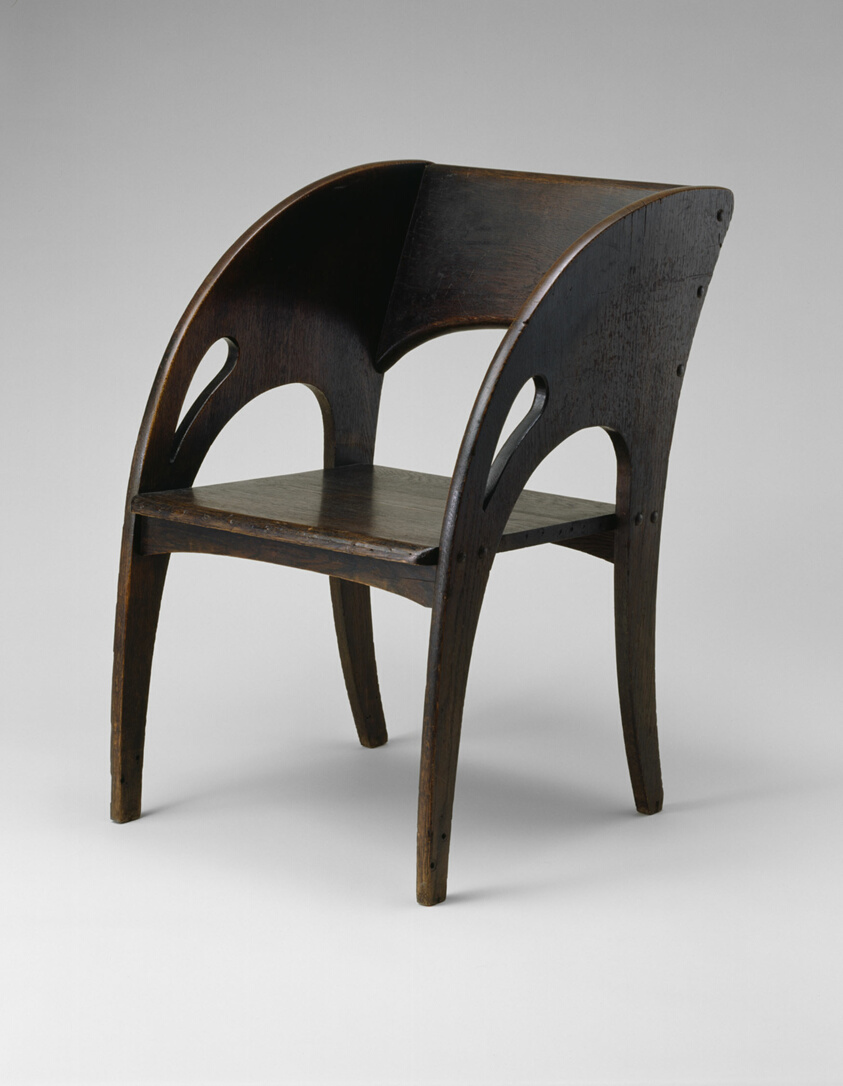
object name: Furniture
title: Armchair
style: Arts and Crafts Movement, American Arts and Crafts Movement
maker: Manufactured by J. S. Ford, Johnson and Company; American, 1872–early 20th century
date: 1904–5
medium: Brown-stained oak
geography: Chicago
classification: seating; furniture; american decorative arts; american arts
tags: Chicago